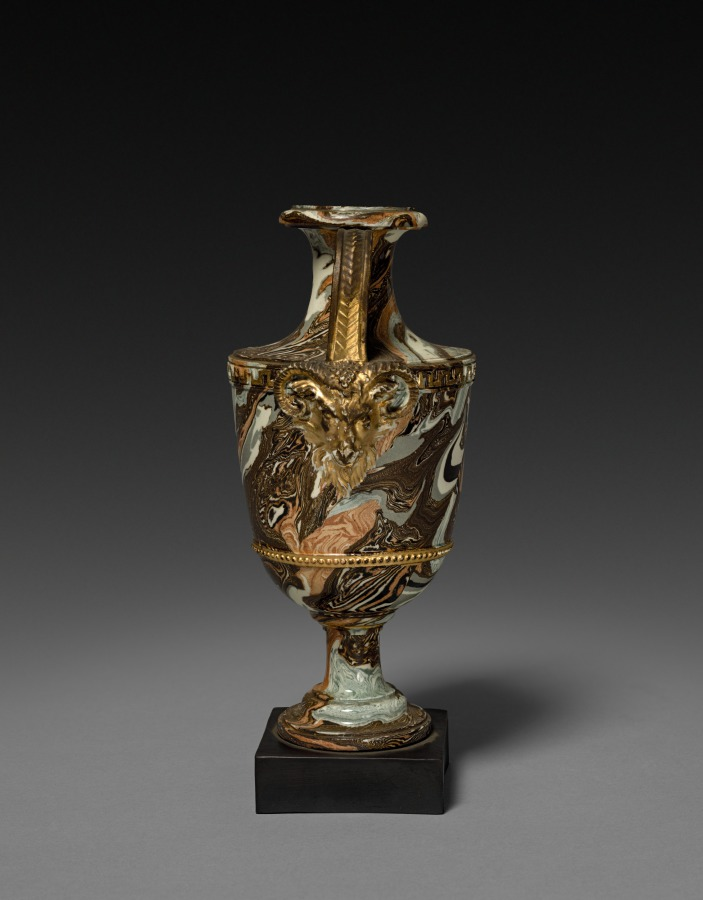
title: Urn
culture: England, late 18th or 19th century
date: late 1700s - 1800s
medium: earthenware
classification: Ceramic